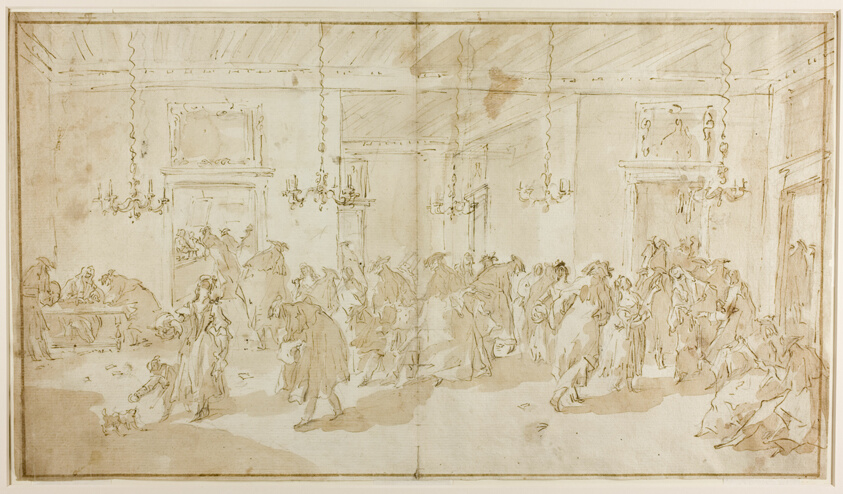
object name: Drawing and Watercolor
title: Il Ridotto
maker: Giovanni Antonio Guardi (Italian, 1699-1760)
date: 1752/55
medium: Pen and brown ink, brush and brown wash, over black chalk, on ivory laid paper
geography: Italy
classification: drawings (visual works); prints and drawing